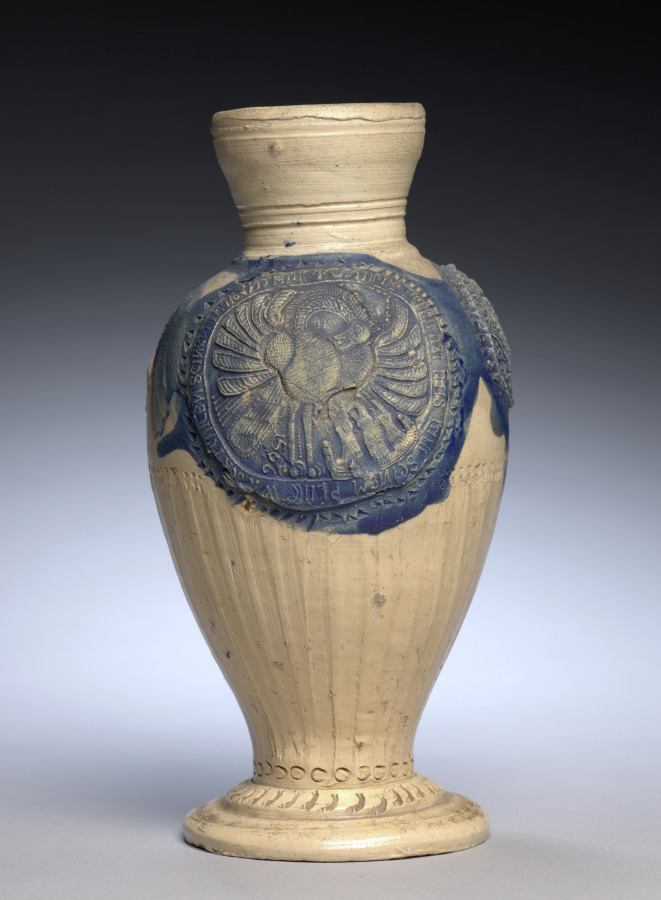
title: Light Tan Pitcher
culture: Germany, Rhenish, probably Sieberg, 19th century (?)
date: 1800s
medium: stoneware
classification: Ceramic